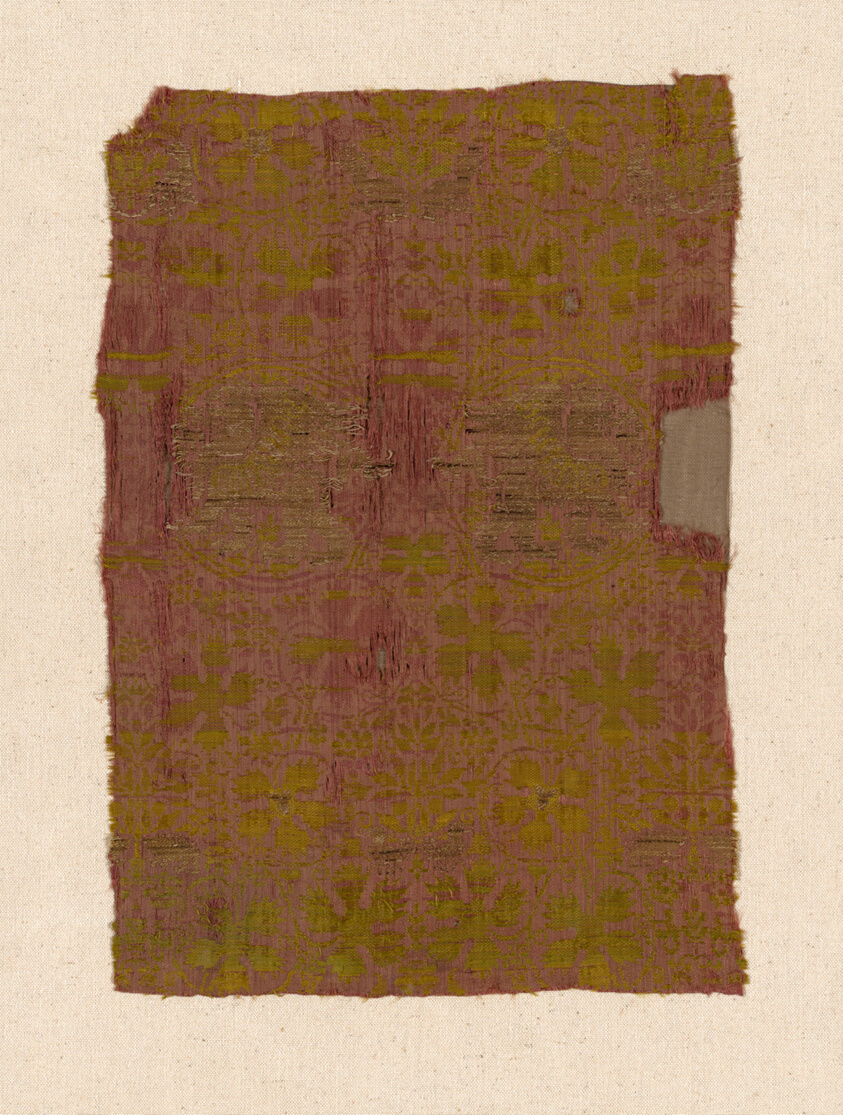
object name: Textile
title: Fragment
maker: Italy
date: 1325/75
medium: Silk and gilt-animal-substrate-wrapped linen, plain weave with supplementary patterning and brocading wefts bound by secondary binding warps in plain interlacings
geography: Italy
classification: textile; weaving